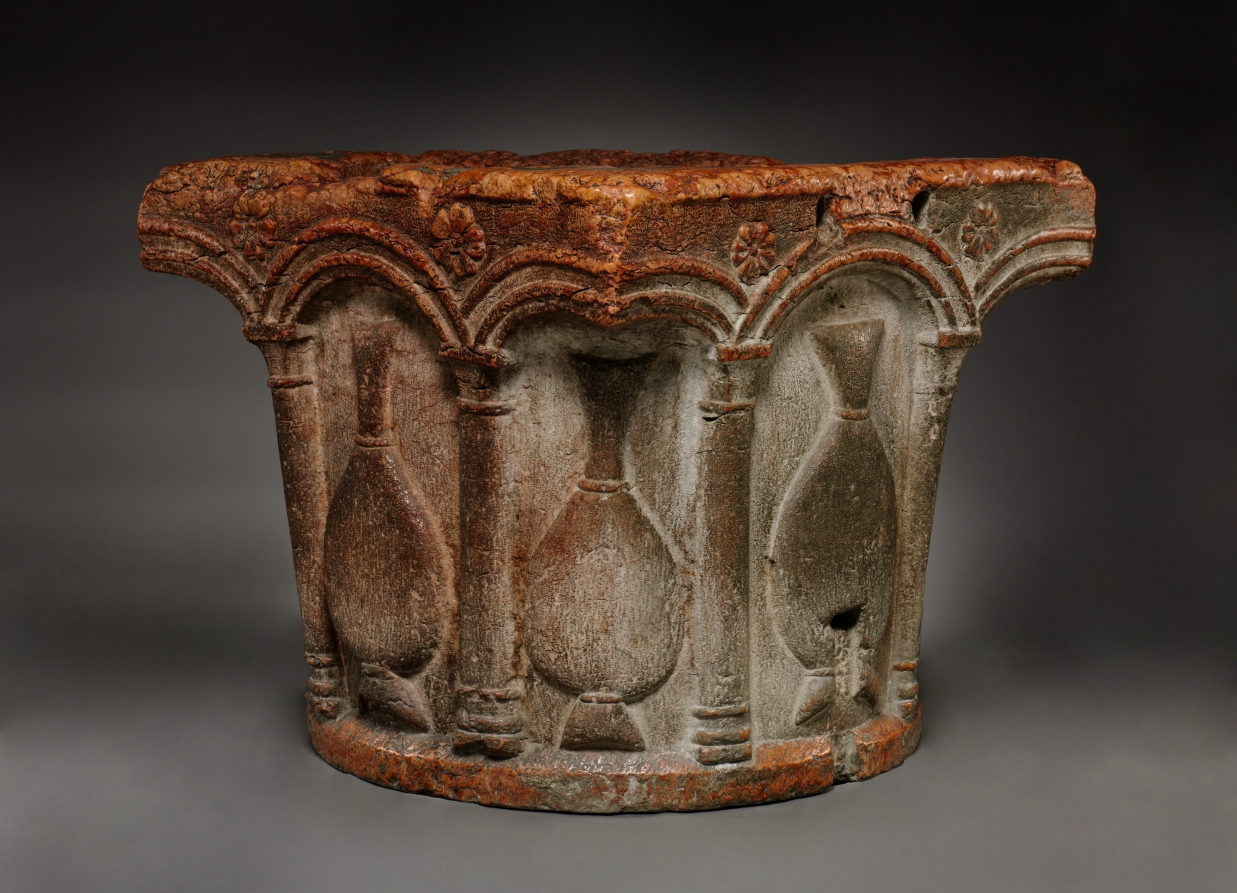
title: Well Head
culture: Italy, probably Verona, 15th century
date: 1400s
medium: pink limestone (called "Verona Marble")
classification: Sculpture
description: A well head is an architectural element that protects the mouth of a well. This example is both decorative and functional. The durable pink limestone well head facilitated access to the water whose restorative nature is echoed in the flowers and vases that ornament its surface.